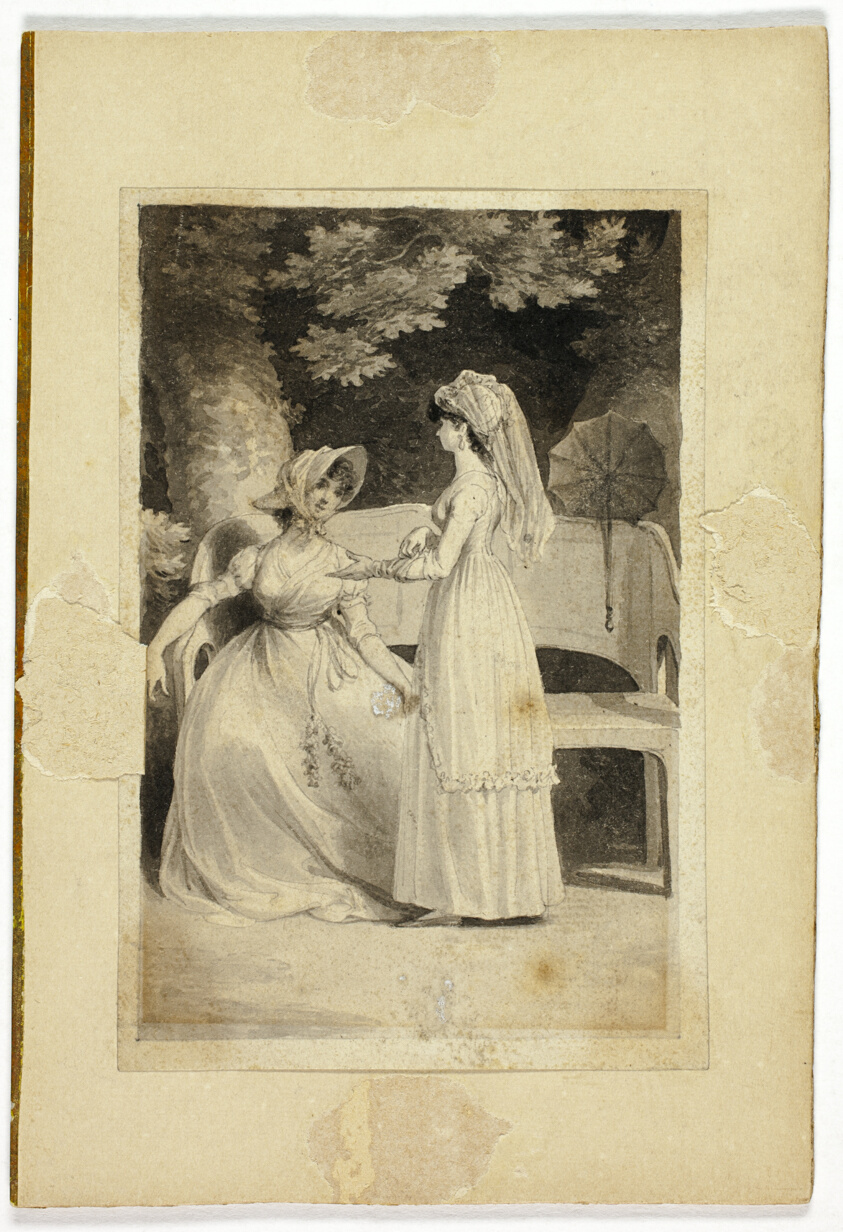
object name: Drawing and Watercolor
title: Two Women in a Garden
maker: Attributed to Richard Corbould; English, 1757-1831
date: 1795/97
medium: Brush and gray wash on ivory wove paper, laid down on board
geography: England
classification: ink or chalk wash; drawings (visual works); prints and drawing